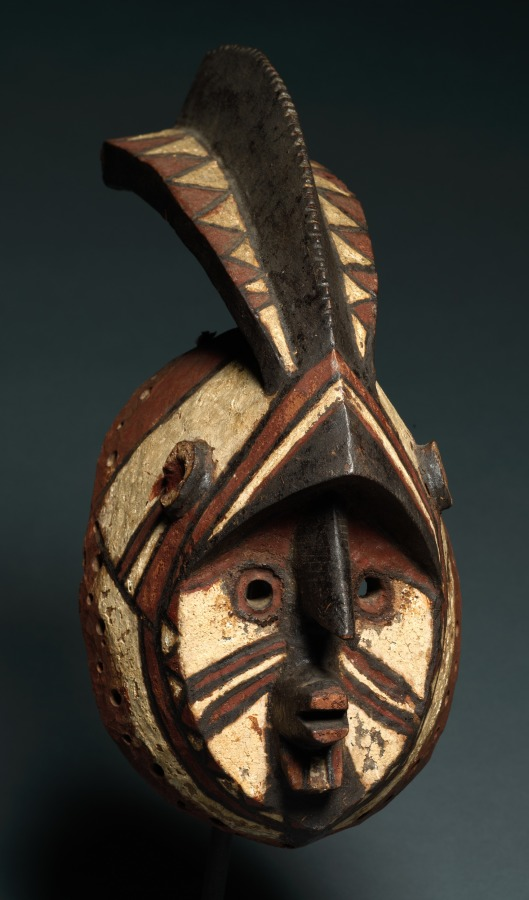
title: Mask (wan-balinga)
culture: Africa, West Africa, Burkina Faso, Mossi-style blacksmith-carver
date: early 1900s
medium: Wood and paint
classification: Mask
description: Only the farmers among the Mossi people employ masks. This mask’s proper name, wan-balinga, evokes a mythical figure who was the mother of the first Mossi ruler. Such masks are most typically worn and danced with on the occasion of the funeral of a male or female elder as escorts of the corpse to the grave. They also appear during annual memorial services that occur months after the actual burial, when all the deceased clan members are commemorated and honored.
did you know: This mask was worn and danced upon the death of an elder, escorting the corpse to the grave.